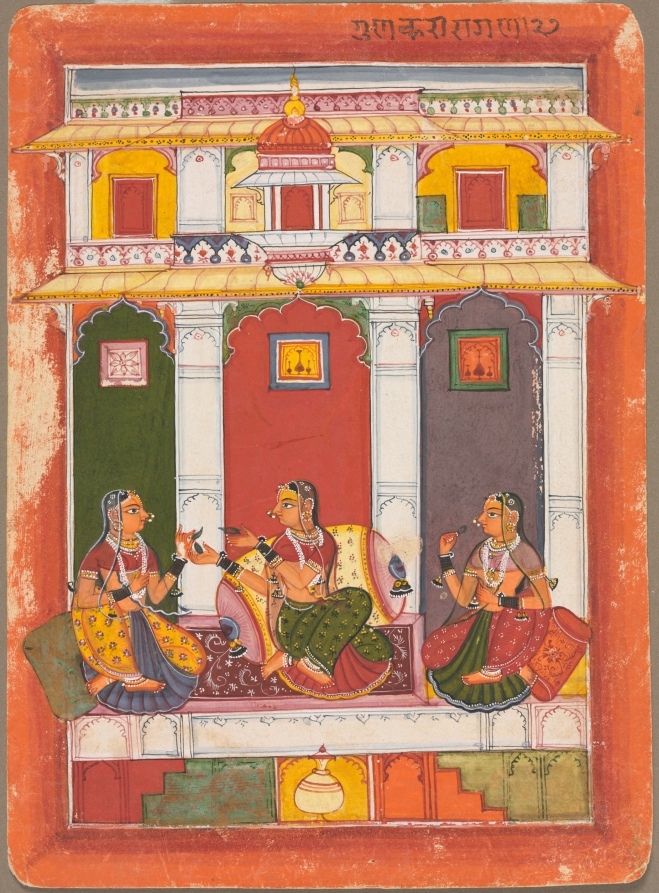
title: Gunakali Ragini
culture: India, Rajasthan, Sirohi, late 17th or early 18th century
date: 1675–1725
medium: color on paper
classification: Painting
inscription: upper right: Number 27, Gaunakali Rag